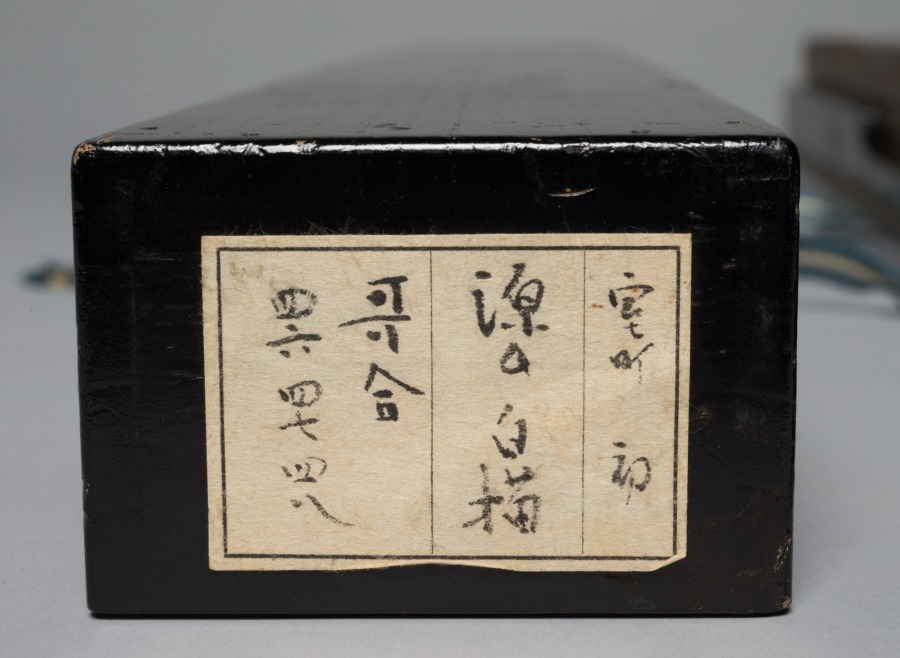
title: Section of an Illustrated Tale of Genji Poetry Contest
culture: Japan, Muromachi period (1392–1573)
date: 1400s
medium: section of a handscroll mounted as a hanging scroll; ink on paper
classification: Painting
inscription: 四十六番 左 ひげくろの大将 心さえ空にみだれし雪の［も」夜に ひとりさえつるかたしきの袖／ 四十七番 うきことを思ひさわ げばさまざまに くゆるけむりぞ いとど たち そふ／ 四十八番 すがくれてかず にも あらぬ かりのこを いづかたにかはとりかくすべき／ 右 雲井のかり かぎりとてわすれがたきを わするるも こや世に なびくこころな るらむ／ あさきなを いひ ながしける かわ ぐちは いかが もらしし せきのあらがき／ あわれをもいかに しりてか なぐさ めむ あるや 恋しき なきや かなしきに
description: This hanging scroll was once part of a handscroll depicting a waka (thirty-one syllable verse) poetry contest between characters from the 11th-century literary classic Tale of Genji. In this section, a woman known informally as Kumoi no kari, or “Goose in Fog,” after a lovelorn line she hums in the novel, is pitted against Higekuro no taishō, or “General Blackbeard.” Three of his poems, numbered 46 to 48, from “The Handsome Pillar” chapter appear over his image. The subsequent three poems inscribed above Kumoi no kari are presented as her “responses,” and come from "The Plum Tree Branch", “New Wisteria Leaves”, and "Evening Mist" chapters.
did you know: General Blackbeard laments having smelly ash poured upon him by his angry wife in one of the poems.